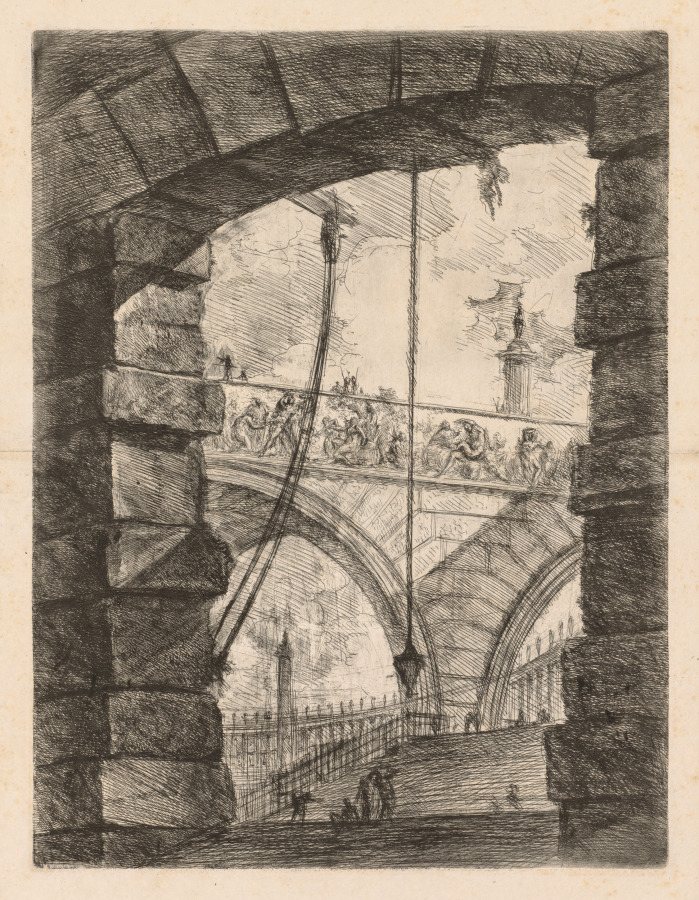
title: The Prisons: A Lofty Arch with a Frieze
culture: Italy, 18th century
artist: Giovanni Battista Piranesi (Italian, 1720–1778)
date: 1745–1750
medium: etching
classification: Print